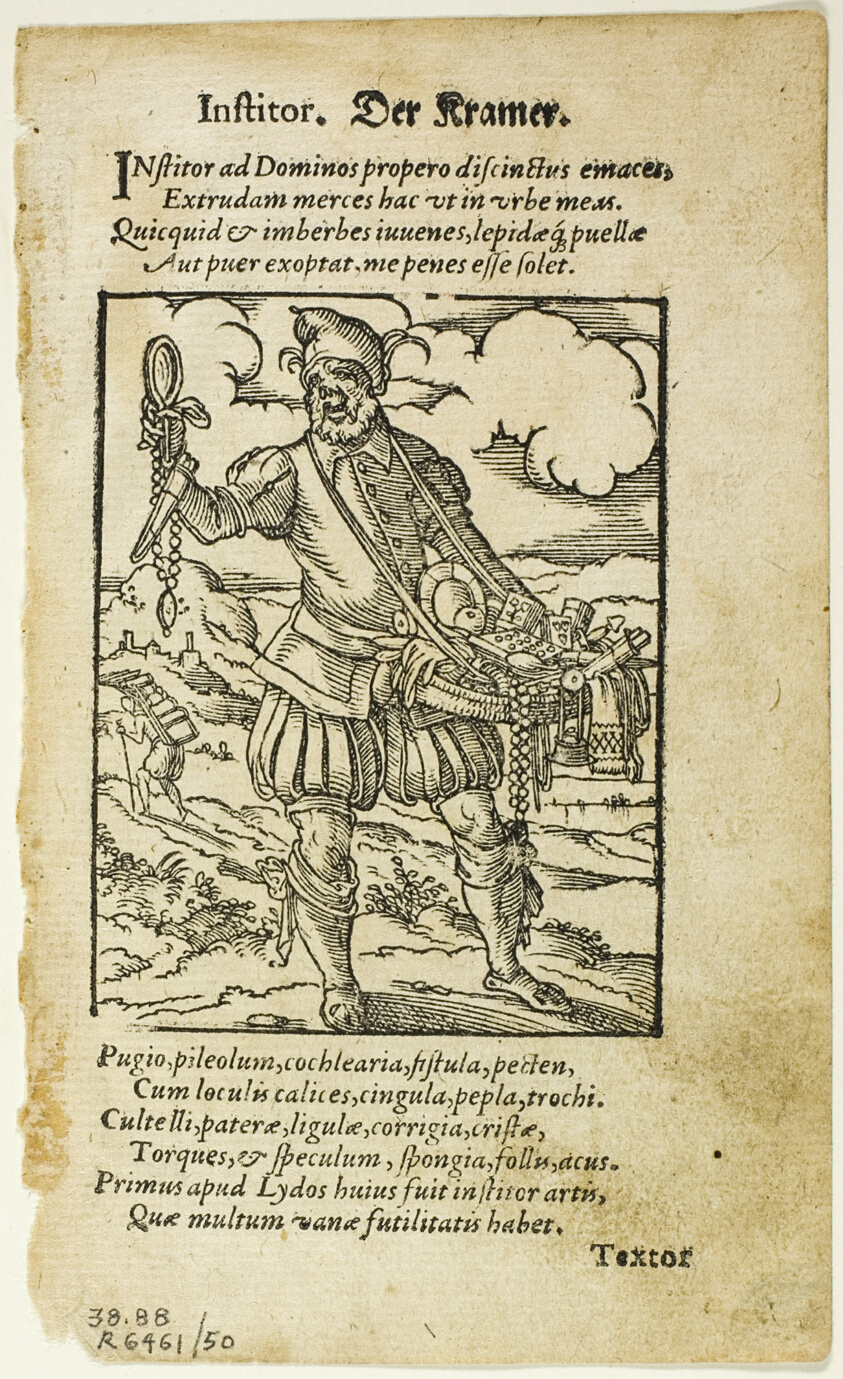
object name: Print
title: Der Kramer (The Peddler) from De omnibus illiberalibus sive mechanicis artibus by Hartmann Schopper, plate 50 from Woodcuts from Books of the XVI Century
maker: Jost Amman (Swiss, 1539-1591); assembled by Max Geisberg (Swiss, 1875-1943)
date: 1574, assembled into portfolio 1937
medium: Woodcut on paper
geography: Switzerland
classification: woodcut; print; prints and drawing